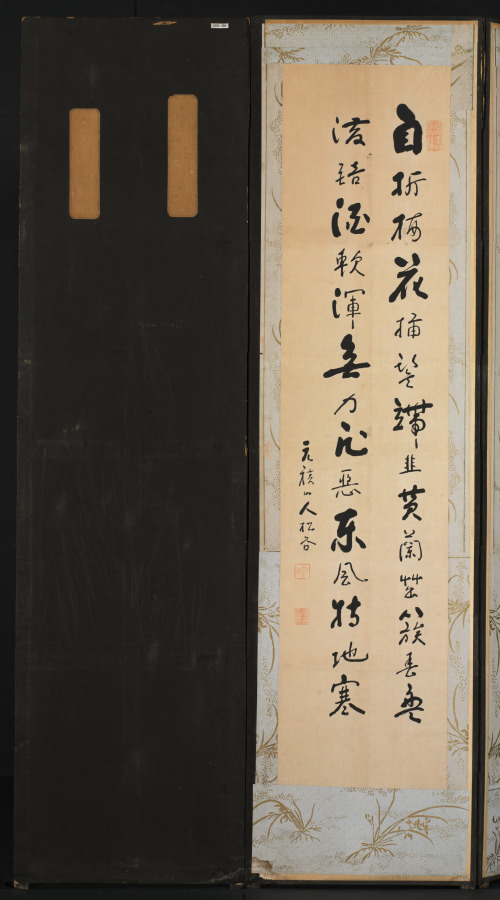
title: Calligraphy (reverse)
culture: Korea, Joseon dynasty (1392–1910)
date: late 1800s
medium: Ten-panel folding screen affixed with album leaves (obverse), calligraphy (reverse), ink and color on silk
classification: Painting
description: The front of this screen features an assortment of subjects: birds and flowers, landscapes, and scenes of everyday life, mostly in monochromatic ink with light colors. The screen’s reverse side conveys a number of classical poems about the fleeting beauty of the four seasons. Traditionally, only one side of a folding screen bears painted or embroidered images, since these were used as a background furnishing. In Korean houses by the 1800s and early 1900s, however, two-sided folding screens became noticeably popular, possibly inspired by Japanese double-sided folding screens, which mainly served as room dividers in Japanese households.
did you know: A calligrapher has brushed several Chinese poems about the four seasons on the reverse side, among them "Composing in the Daytime of Summer" by Tang poet Liu Zongyuan (773–819) and "Composing when Spring Begins" by Song scholar Zhang Shi (1133–1180).